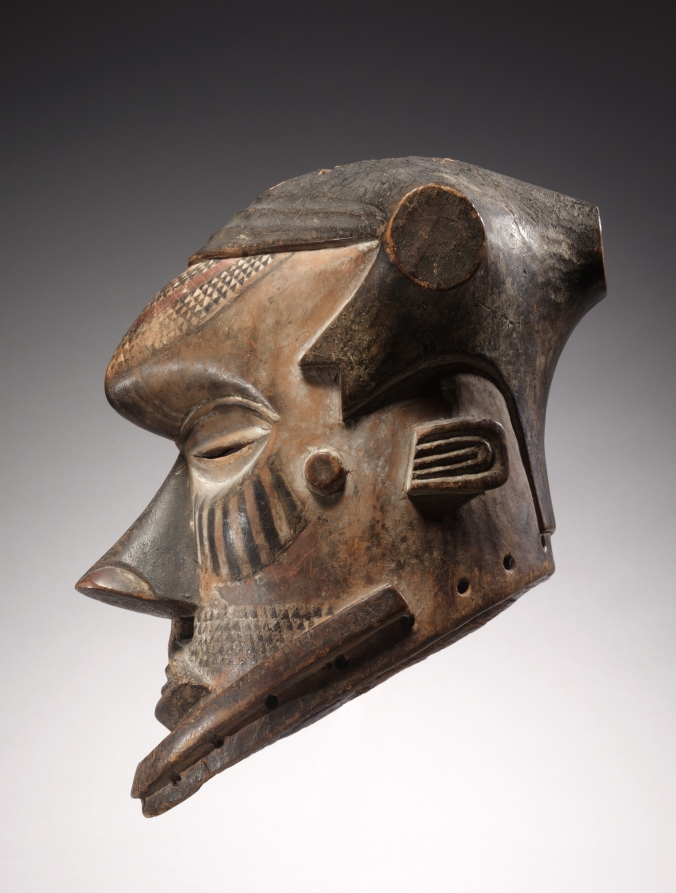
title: Mask (Bwoom)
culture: Africa, Central Africa, Democratic Republic of Congo, Kuba-style carver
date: mid- to late 1800s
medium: Wood and paint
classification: Mask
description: Among the Bushoong, the central Kuba group, the mask known as bwoom—most typically identified as the head of a hunter-gatherer—forms a triad with a female mask and another male mask. All three are protagonists in the reenactment of the foundation of the Kuba kingdom. Outside the capital, however, bwoom appears in different non-royal contexts, such as the men’s initiation society.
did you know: Imagine this mask topped with eagle feathers; they would have been added only on special occasions when it was performed.